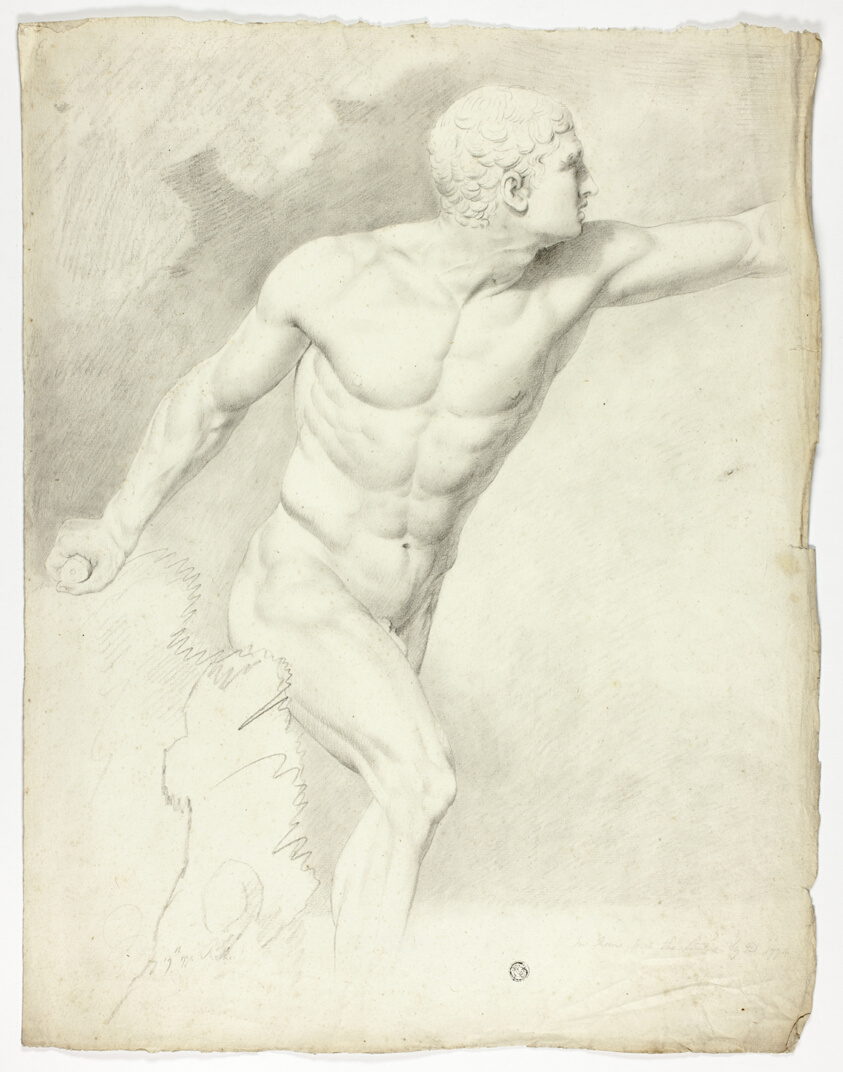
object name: Drawing and Watercolor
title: The Borghese Gladiator from the Statue in Rome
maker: John Downman (English, 1750-1824)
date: 1774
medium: Charcoal with stumping and touches of black crayon on ivory laid paper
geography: England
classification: charcoal; drawings (visual works); prints and drawing